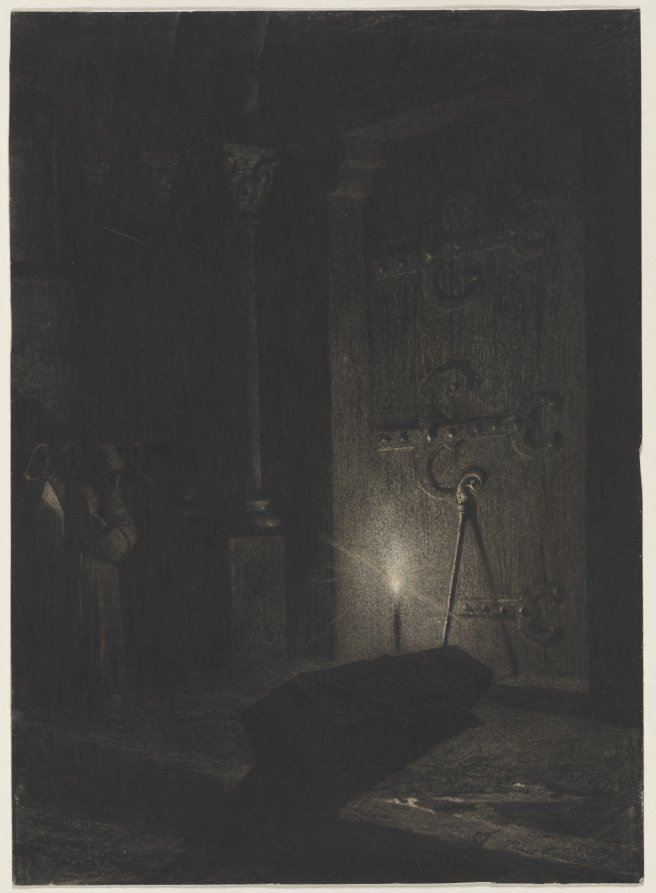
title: A Funeral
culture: France, 19th century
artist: Jean-Paul Laurens (French, 1838–1921)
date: c. mid-1870s-early 1880s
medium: charcoal and brush and black and brown ink, with stumping and scratching away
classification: Drawing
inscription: signed, lower right, in black ink: J Paul Laurens; formerly inscribed in graphite at lower right of mount: 132 (mount destroyed)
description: The macabre subject matter of A Funeral is typical of Jean-Paul Laurens, whose interest in depicting cadavers and coffins earned him the nickname "the painter of the dead." Laurens was also attracted to subjects from church history, and, here, the crosier leaning against the door behind the coffin indicates the deceased was a bishop. Highly finished drawings like this one are rare in Laurens's production. His technique of covering the surface with a variety of media and scratching away for highlights is quite similar to the one used by another artist in the exhibition-Alexandre Bida, in his Café at Constantinople [cat. no. 34]. Laurens utilized the technique effectively in this gloomy scene, where the glowing candle flame casts long shadows and feebly illuminates the columns receding into darkness on the left.